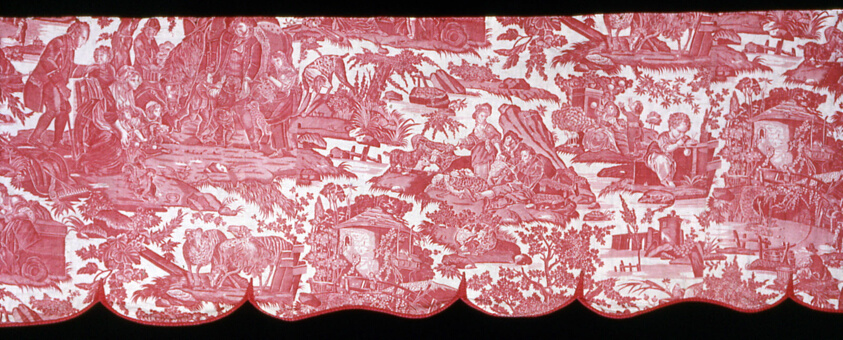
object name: Textile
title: Dites Merci (Furnishing Fabric)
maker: Manufactured by J.P. Meillier et Cie. (French, 1792-1826); France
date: c. 1798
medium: Cotton; copperplate printed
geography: France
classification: textile; weaving - printed; furnishing textile